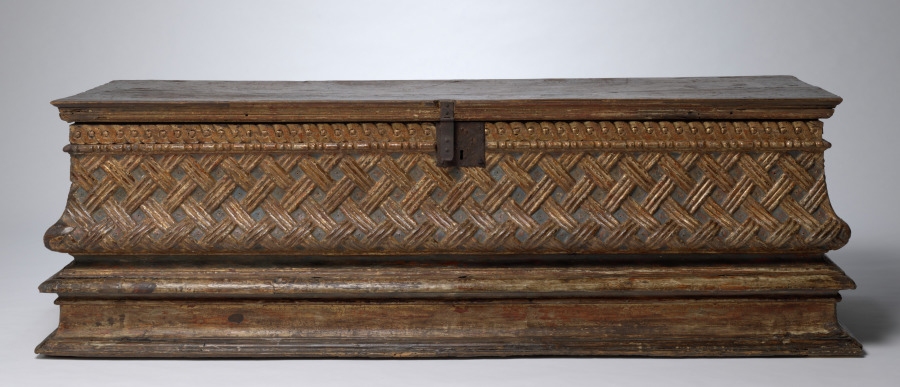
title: Cassone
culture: Italy, early 16th century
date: early 1500s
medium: walnut, painted and gilded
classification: Furniture and woodwork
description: Chests such as this were made in pairs and presented to young women on the occasion of their marriage. They not only provided storage space in the home for clothing and personal effects, but could also be used as a bench to sit on. It was not uncommon for any one room in a Renaissance palace to have several. This chest was in Savoy Castle, near Verzuolo, in the Piedmont region of northern Italy from the 1500s until 1922..